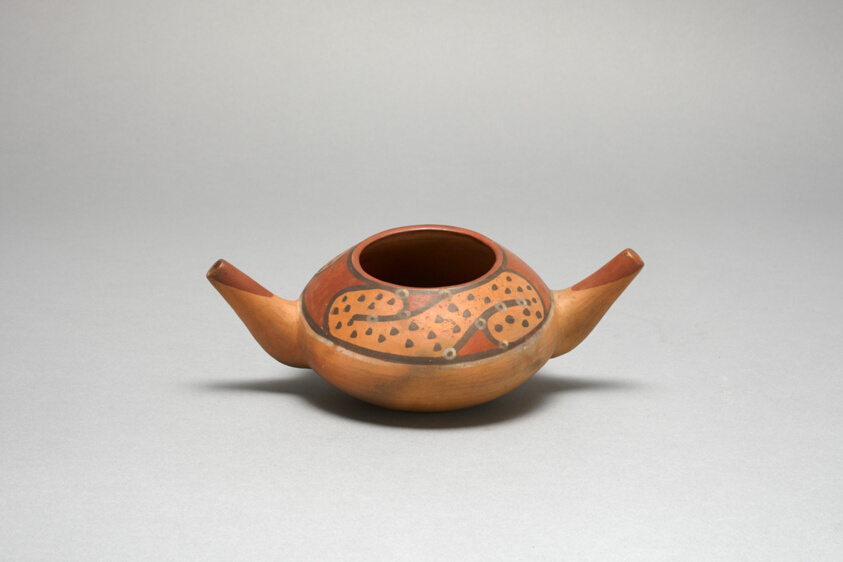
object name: Vessel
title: Small Double Spout Bowl with Repeated Curving Motif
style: lima, Arts of the Americas, south american, peruvian, maranga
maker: Possibly Lima or Maranga; Central coast, Peru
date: c. 500–700 CE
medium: Ceramic and pigment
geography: Peruvian Central Coast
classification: bowl; earthenware; ceramics; vessel; art of the americas